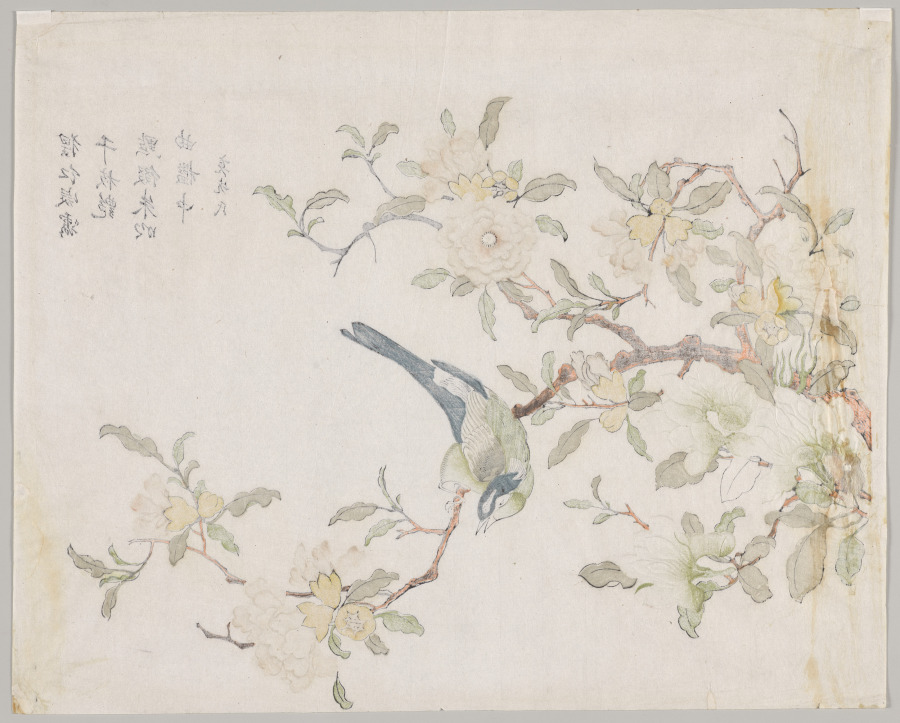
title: Bird on Pomegranate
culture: China, Suzhou, Qing dynasty (1644–1911)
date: first half of the 1700s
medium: Polychrome woodblock print; ink and color on paper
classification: Print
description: In the 1600s, printing flourished in such Jiangnan cities as Nanjing, Suzhou, Hangzhou, and Huizhou, evolving from privately enjoyed illustrated books printed in color to more commercialized single-sheet color prints that were hung on walls and became part of the rich urban visual culture.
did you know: Woodblock printing in color reached a height in China in the 1600s to 1700s. The prints were executed by means of sets of separate blocks, each carved to print a different color.